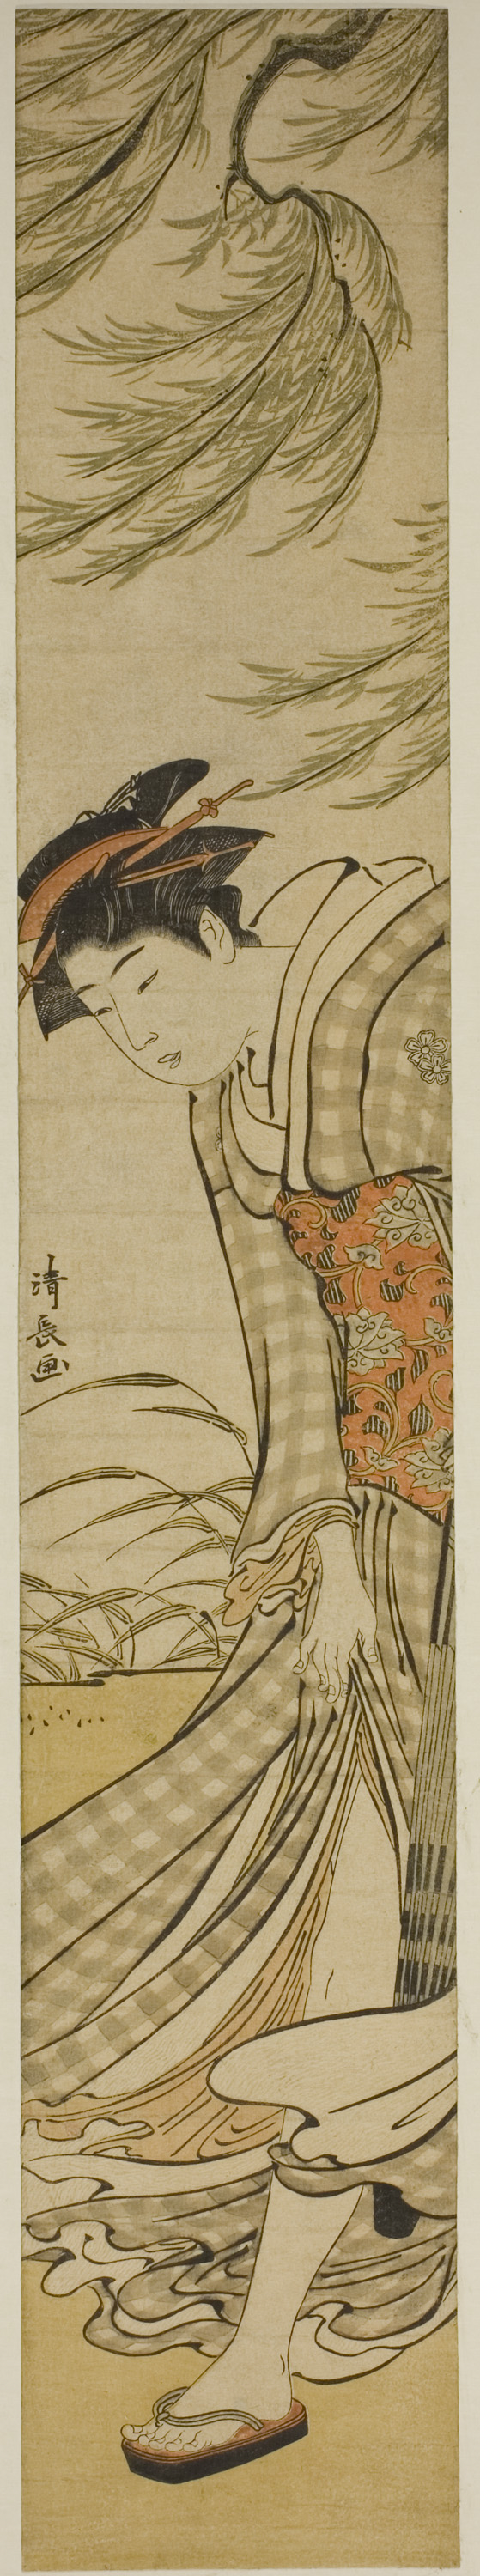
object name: Print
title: Courtesan Walking Under a Willow Tree on a Breezy Day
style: Japanese (culture or style)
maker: Torii Kiyonaga (Japanese, 1752-1815)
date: c. 1783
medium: Color woodblock print; hashira-e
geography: Japan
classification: woodblock print; print; asian art